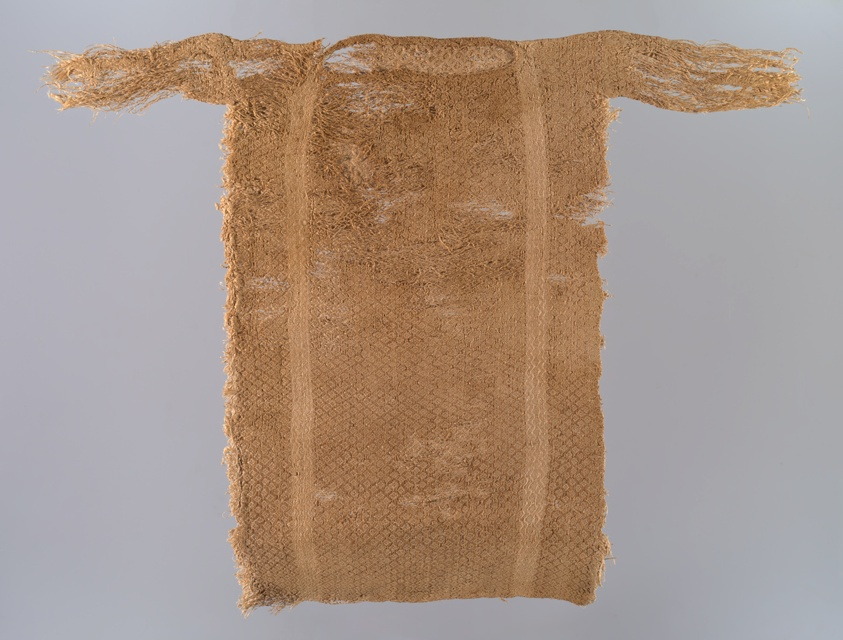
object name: Costume and Accessories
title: Child's Tunic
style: roman period (egyptian)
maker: Coptic (Egypt)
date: Roman period (30 B.C.– 641 A.D.)/Arab period (641–969), 7th century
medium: Linen, compound twill weave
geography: Egypt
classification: textile; weaving; costume; dress (garment); clothing